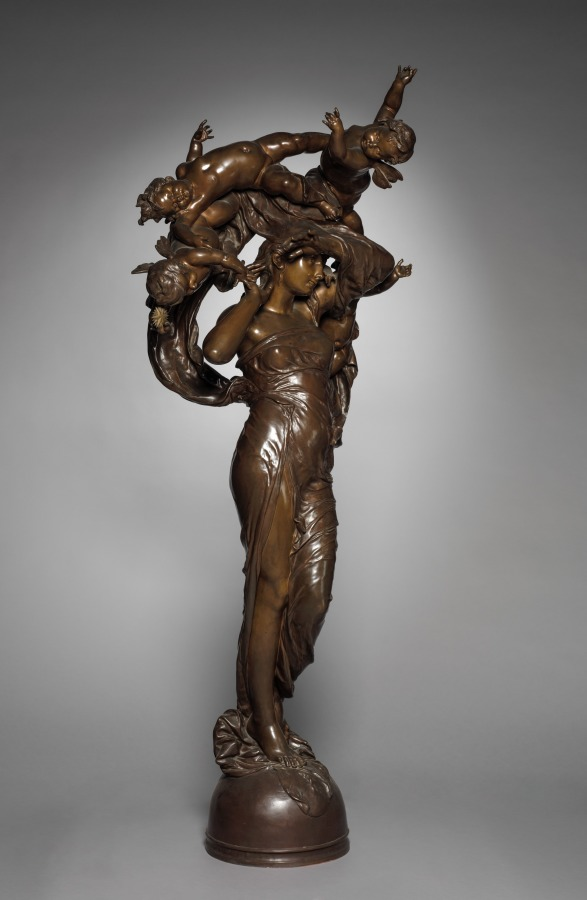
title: Dawn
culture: France, 19th century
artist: Gustave-Joseph Chéret (French, 1838–1894)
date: c. 1883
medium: bronze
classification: Sculpture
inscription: signed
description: This sculpture is of the same design as one exhibited by Chéret at the Paris Salon of 1883.